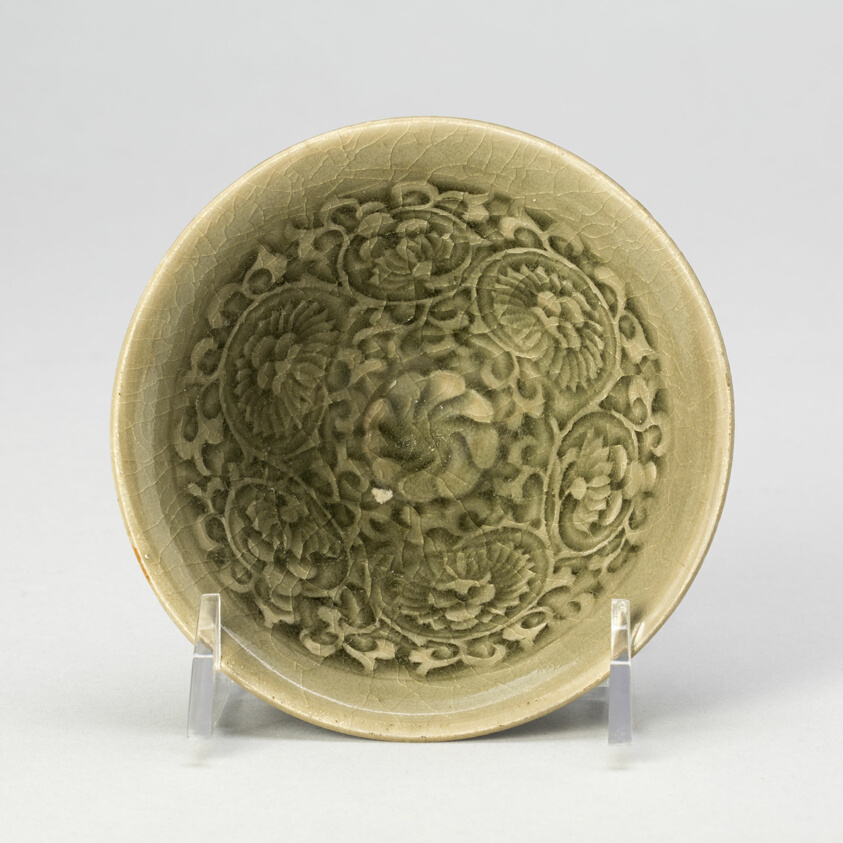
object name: Vessel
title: Conical Bowl with Peony Scroll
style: Chinese (culture or style)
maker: China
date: Northern Song (960–1127) or Jin dynasty (1115–1234), 12th century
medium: Yaozhou ware; stoneware with underglaze molded decoration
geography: China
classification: bowl; stoneware; dish (vessel); asian art; ceramics; vessel